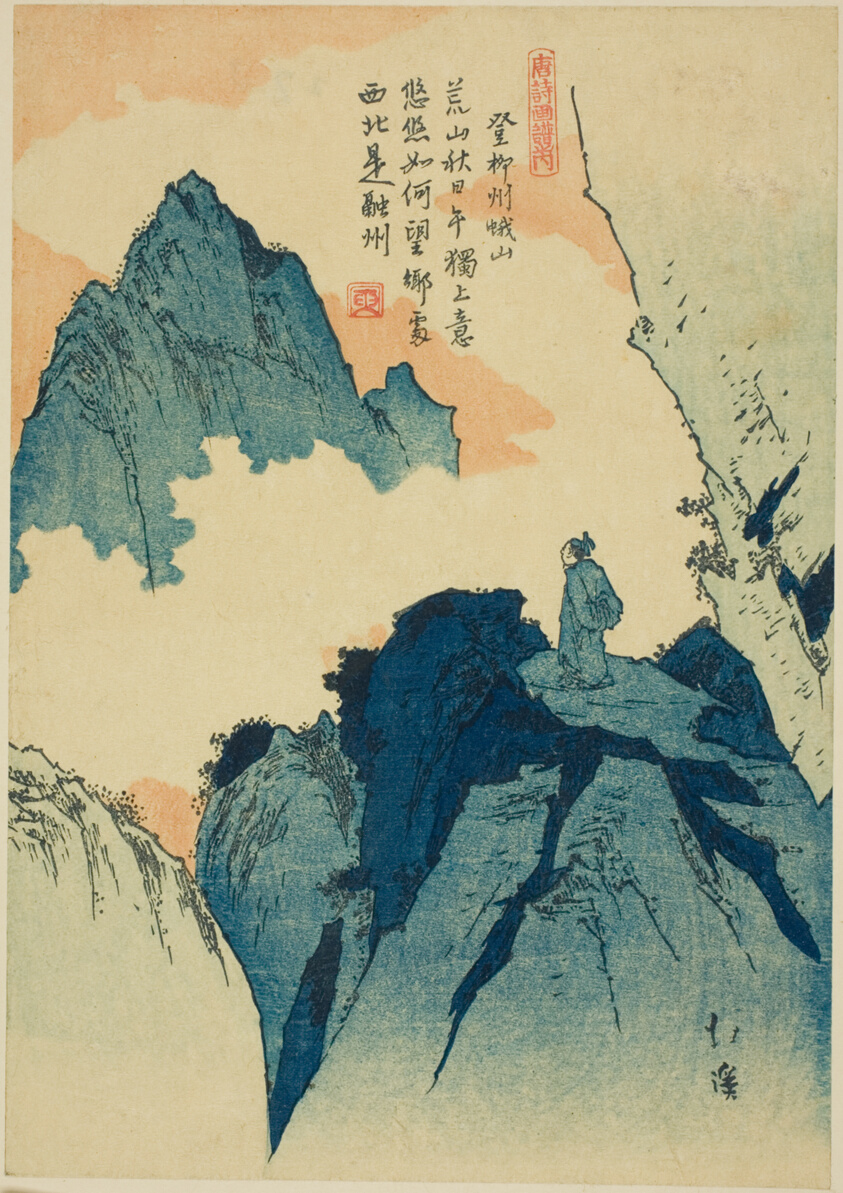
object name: Print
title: Climbing a mountain in Liuzhou, from the series "Picture Book of Chinese Poems (Toshi gafu no uchi)"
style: Japanese (culture or style)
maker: Totoya Hokkei (Japanese, 1780–1850)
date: c. 1830/44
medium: Color woodblock print; chuban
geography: Japan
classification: woodblock print; print; asian art